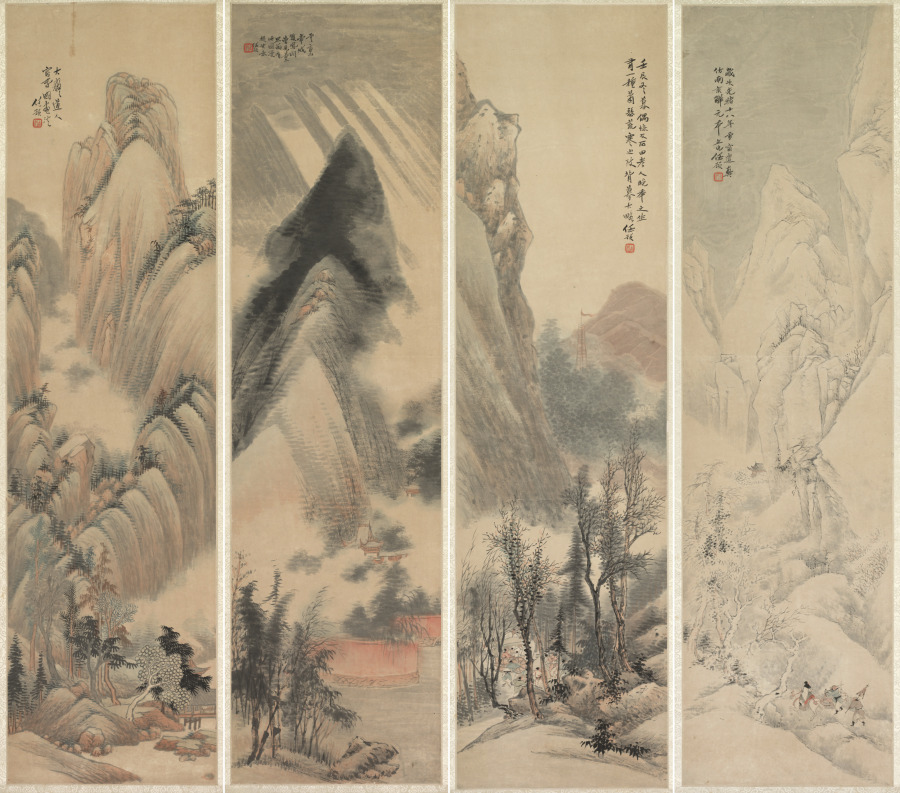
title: Landscapes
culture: China, Qing dynasty (1644-1911)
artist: Ren Yu (Chinese, 1853–1901)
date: 1892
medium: Set of four hanging scrolls; color on paper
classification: Painting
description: This set of four seasonal landscape hanging scrolls are by Ren Yu. He was the youngest, most eccentric, and least prolific of the Four Rens, a family of prominent painters in Shanghai during the late Qing dynasty (1644–1911). Perhaps due to his opium habit and subsequent financial difficulties, Ren Yu tended to be lackadaisical in his work. The few remaining high-quality paintings hint at his artistic potential lost to opium. Though Ren’s premature death left his artistic promise unfulfilled, his paintings were acquired and donated to the museum by Charles Lang Freer (1854–1919), a wealthy businessman and art collector from Detroit. As Freer had hoped, this donation of Ren Yu paintings inspired the young Cleveland Museum of Art to continue to expand its own Chinese painting collection.